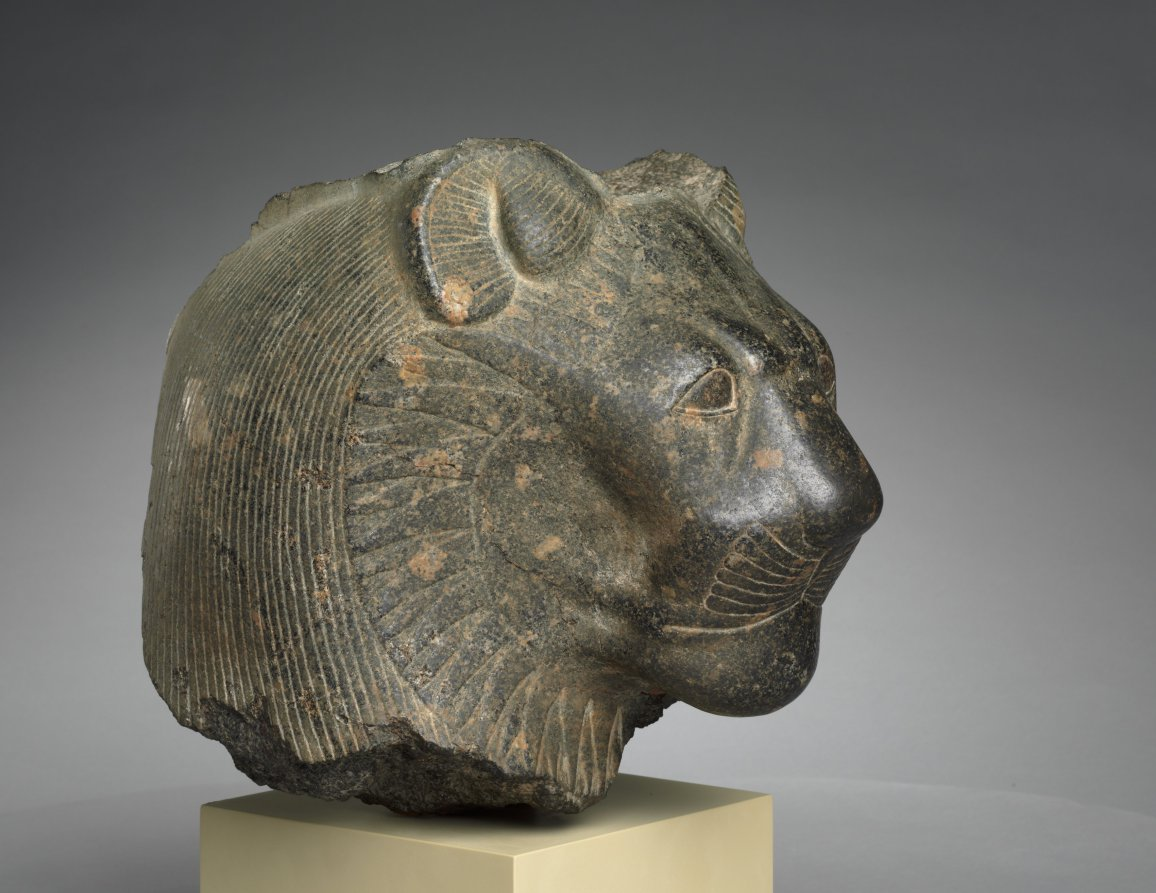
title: Head of Sekhmet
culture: Egypt, Thebes(?), New Kingdom (1540–1069 BCE), Dynasty 18, reign of Amenhotep III (1390–1352 BCE)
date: c. 1391–1353 BCE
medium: granodiorite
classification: Sculpture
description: This lioness head once belonged to a grand statue of the goddess Sekhmet, "the powerful one," probably seated and wearing a tight dress. Possibly appealing to her healing aspect, Pharaoh Amenhotep III, often described as “beloved of Sekhmet,” commissioned and dedicated hundreds of large granodiorite Sekhmet sculptures in his Theban mortuary temple. Thus, this head likely comes from Thebes, perhaps later moved across the Nile—like many such sculptures—to the temple of Mut, a related deity, at Karnak. Behind her stylized ruff, Sekhmet wears a wig, once crowned with a sun disk and uraeus, the stylized cobra symbolizing royal or divine power.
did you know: Amenhotep III may have dedicated 730 statues of Sekhmet, two for each day of the year.